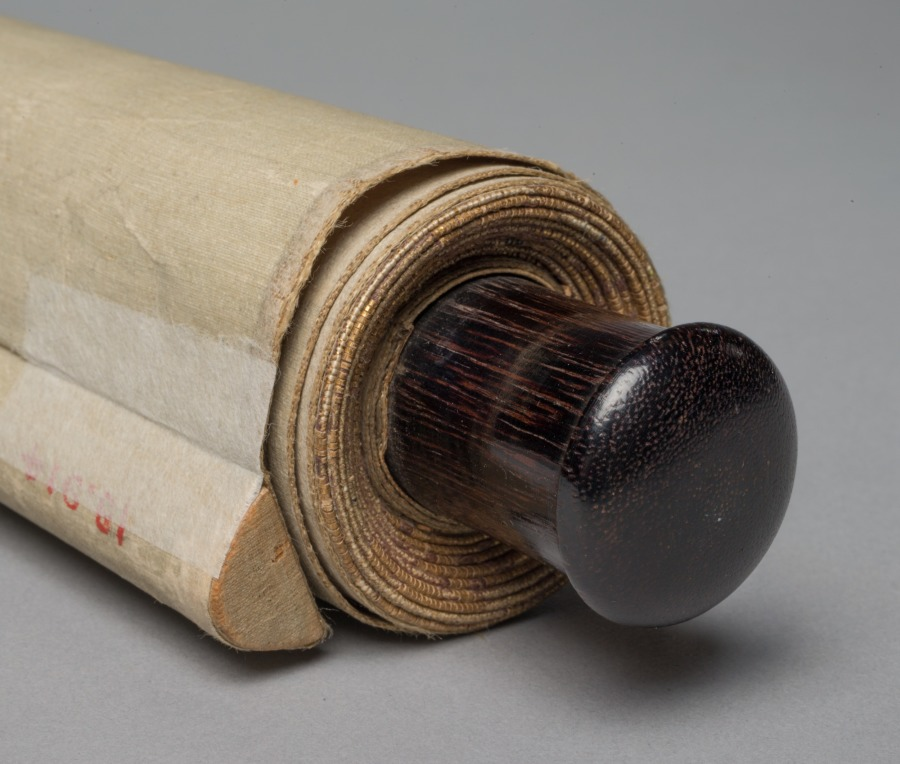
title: Minamoto no Yoshitsune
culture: Japan, Edo period (1615–1868)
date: 1800–1868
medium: hanging scroll; ink and color on paper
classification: Painting